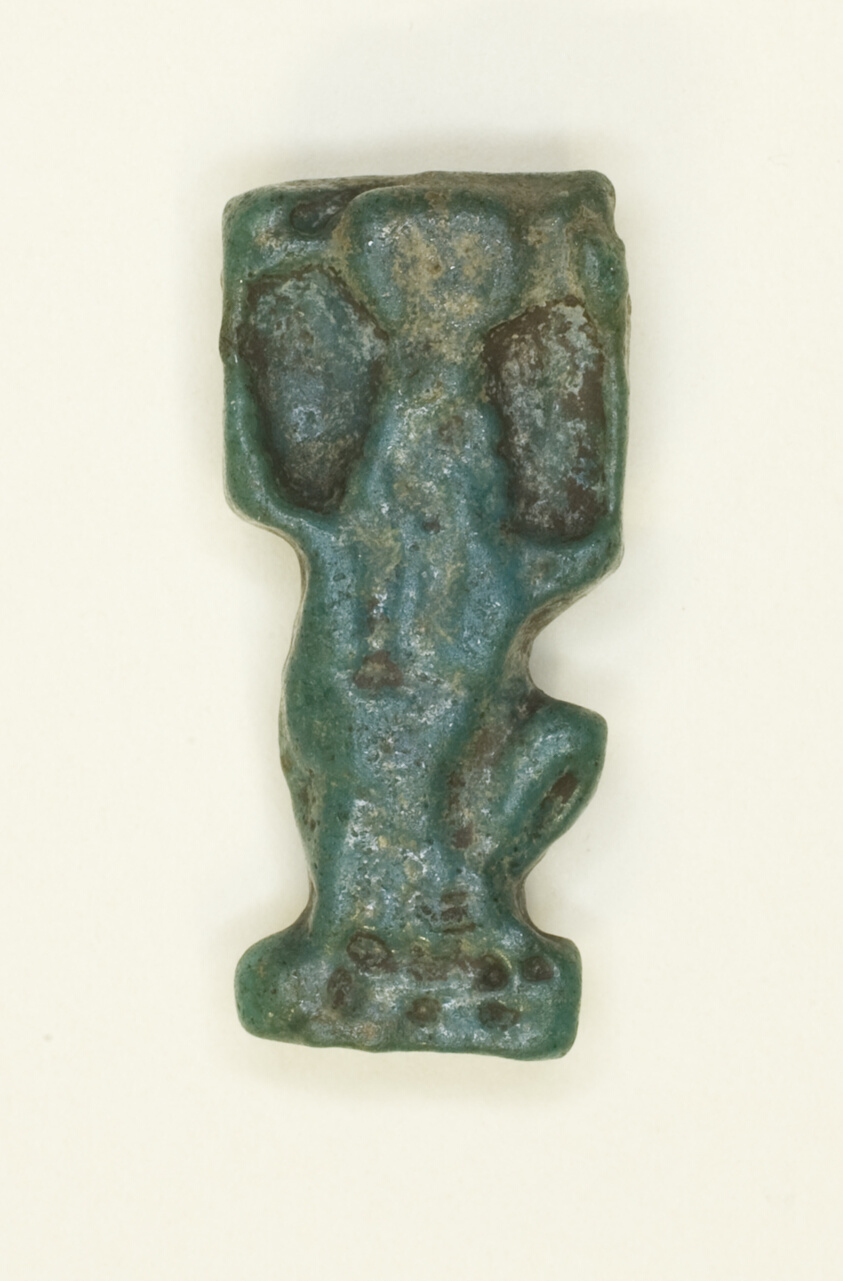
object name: Costume and Accessories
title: Amulet of the God Shu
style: egyptian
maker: Egyptian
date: New Kingdom–Late Period, Dynasties 18–31 (about 1550–332 BCE)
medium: Faience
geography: Egypt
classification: amulet; jewelry; ceramics; ancient art; costume; faïence (composite material)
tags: gods (deities)